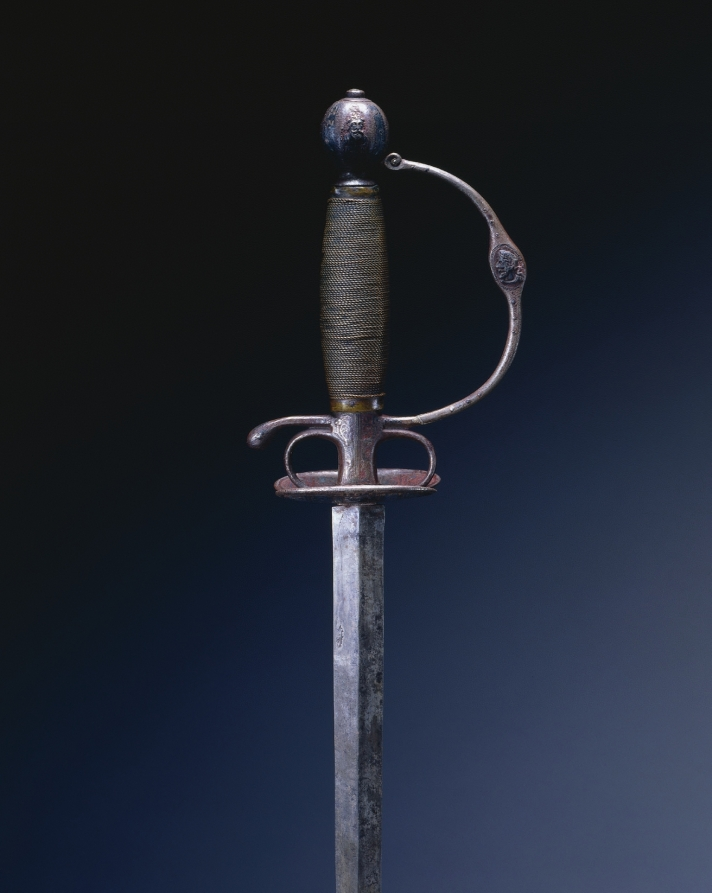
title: Small Sword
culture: France, 17th century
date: c. 1650–70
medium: steel, iron, silver inlay; wood and brass wire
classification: Arms and Armor